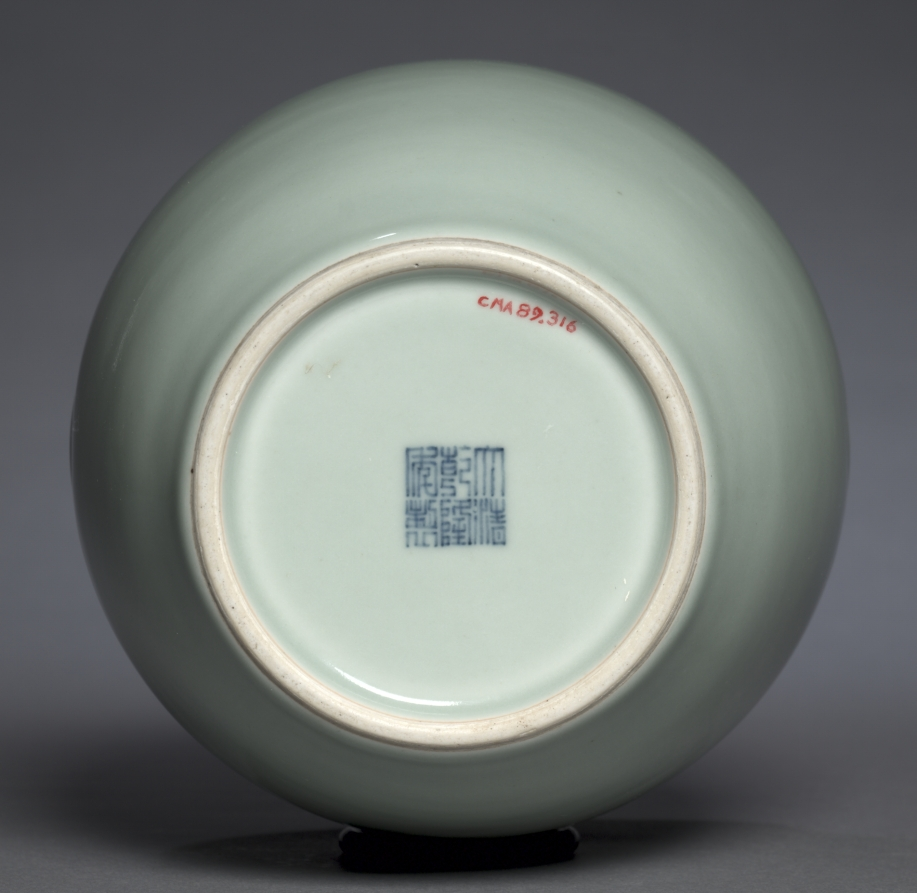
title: Jar with Crescents in Relief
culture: China, Jiangxi province, Jingdezhen kilns, Qing dynasty (1644-1911), Qianlong mark and reign (1736-95)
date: 1736–95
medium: porcelain with applied decoration and celadon glaze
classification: Ceramic